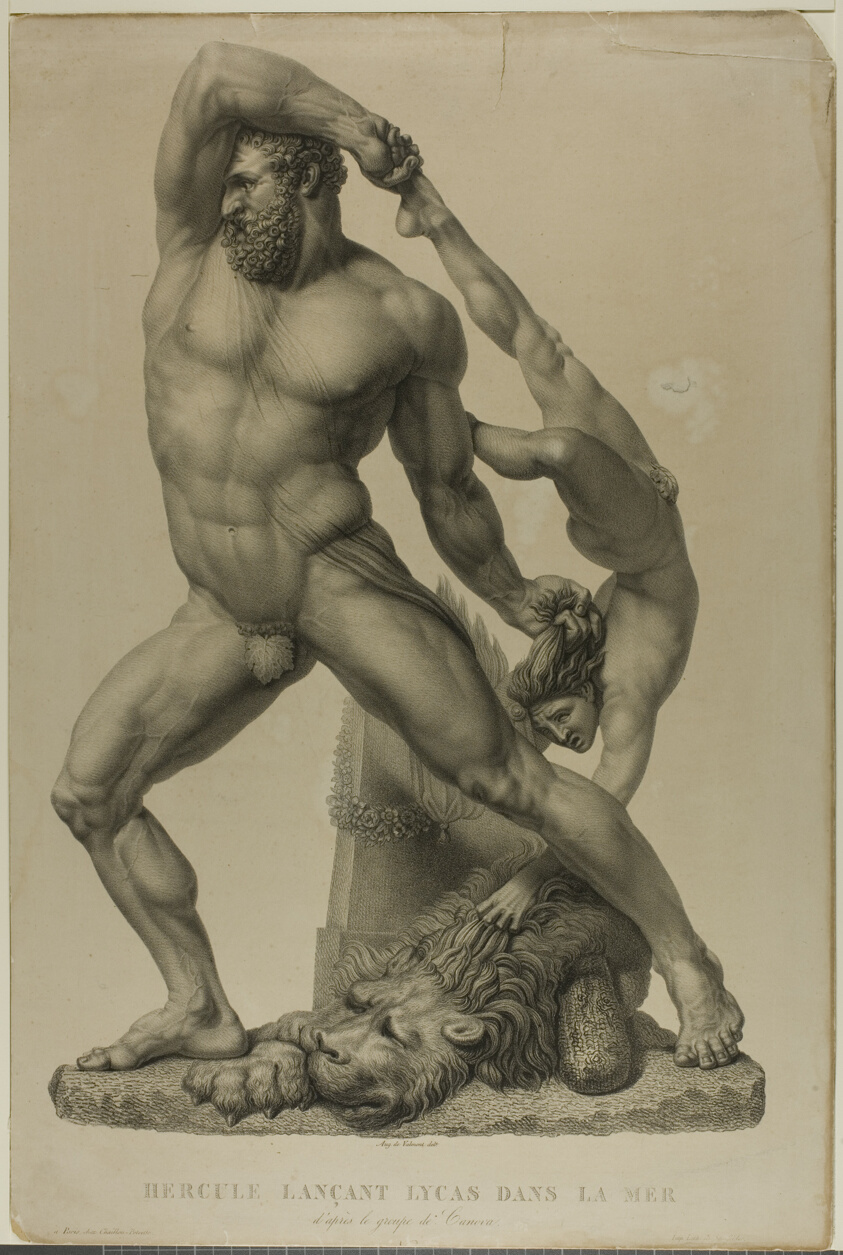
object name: Print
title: Hercules Throwing Lichas into the Sea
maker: Auguste de Valmont (French, active 1815-1845); after Antonio Canova (Italian, 1757-1822); printed by Alois Senefelder (German, 1771-1834); published by Chaillou-Potrelle, chez (French, active 19th century)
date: 1815/45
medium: Lithograph in black on buff wove paper laid down on cardboard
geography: France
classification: lithograph; print; prints and drawing